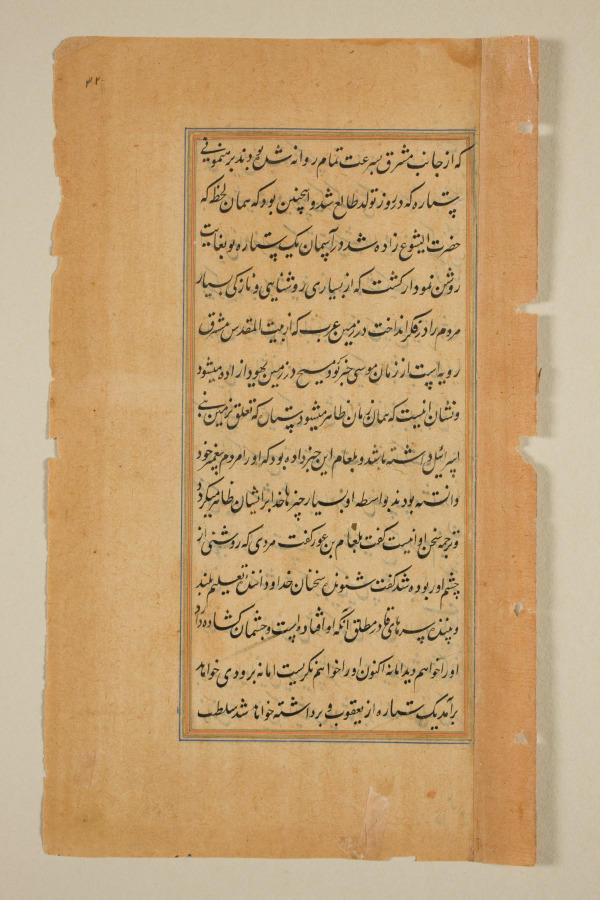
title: Text page from a Mirror of Holiness (Mir’at al-quds) of Father Jerome Xavier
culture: Mughal India, Allahabad, made for Prince Salim (1569–1627)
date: 1602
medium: Ink and gold on paper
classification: Manuscript